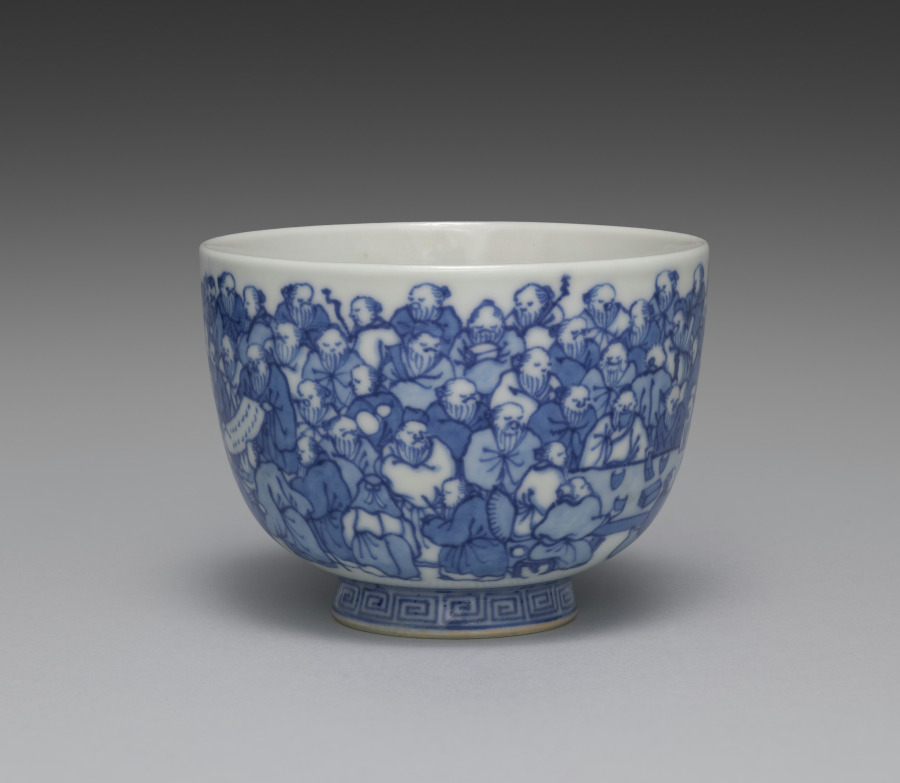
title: Teacup from Teacups with a Hundred Sages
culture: Japan, Meiji period (1868–1912)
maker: Seifū Yohei III (Japanese, 1851–1914)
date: 1893–1914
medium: One from a set of five teacups; porcelain with underglaze blue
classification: Ceramic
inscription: 清風造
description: Each of these five teacups has a painting of identical design in underglaze blue, but as the tiny figures are drawn entirely by hand, each cup has its own personality. The theme of the sencha cups is an assembly of sages or immortals, literally “a hundred venerable [people]” (hyakurō). The myriad figures crowd the scene in groups. The god of longevity, with his tall forehead, sits with his cranes, having flown in from Mt. Penglai on the Isle of the Immortals. Seven long-bearded sages sit around a stone table, chatting and drinking; one is seated on an enormous gourd. Of course, there is a stack of books on the table, and elsewhere, scrolls are being written upon or read—in one case held very close by a sage who is wearing glasses. The design was enormously popular in ceramics made for those engaged in literati culture.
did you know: Seifū Yohei III (1851–1914) produced many works for tea gatherings where people drank Chinese-style leaf-tea (sencha).